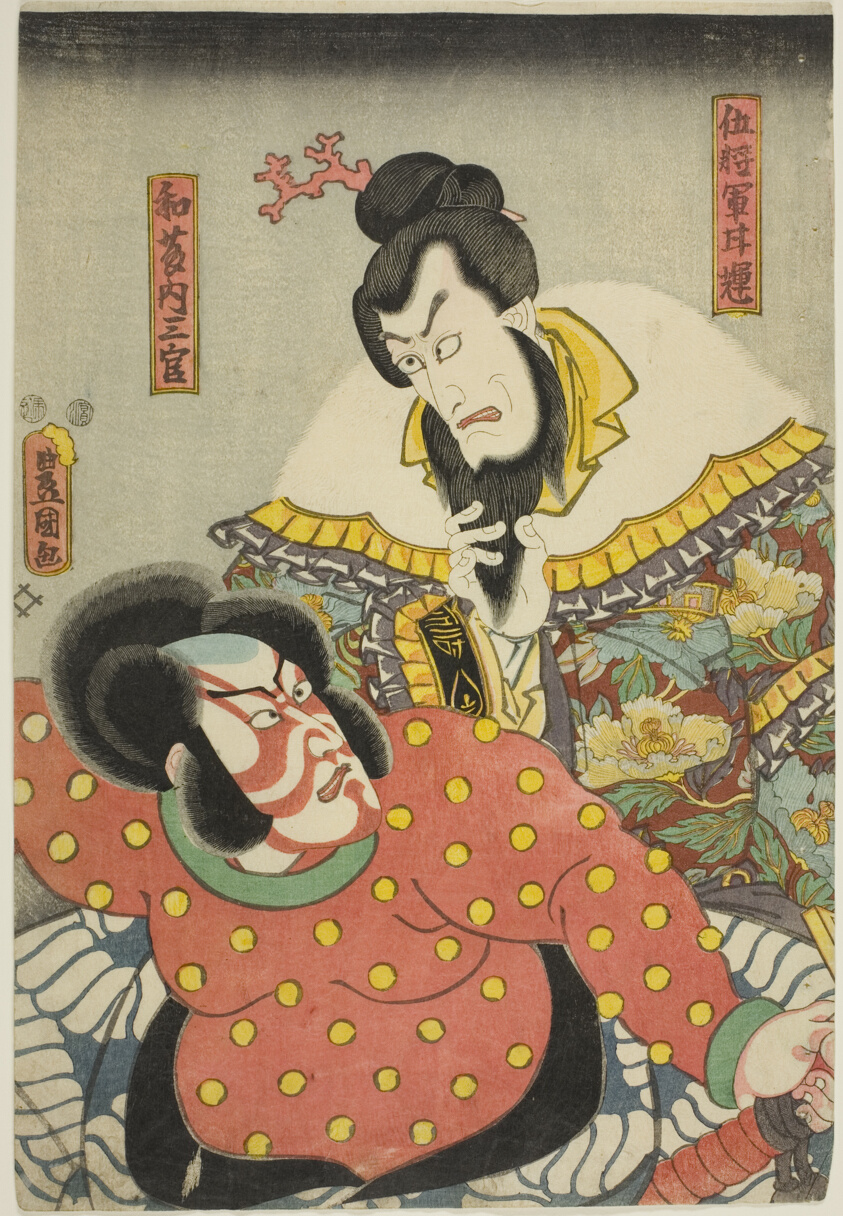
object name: Print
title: The actors Ichikawa Ebizo V as Goshogun Kanki and Ichikawa Danjuro VIII as Watonai Sankan in the play "Kokusanya Kassen," performed at the Nakamura Theater in the fifth month, 1850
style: Japanese (culture or style)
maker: Utagawa Kunisada I (Toyokuni III) (Japanese, 1786-1864)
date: 1850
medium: Color woodblock print; oban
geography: Japan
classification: woodblock print; print; asian art